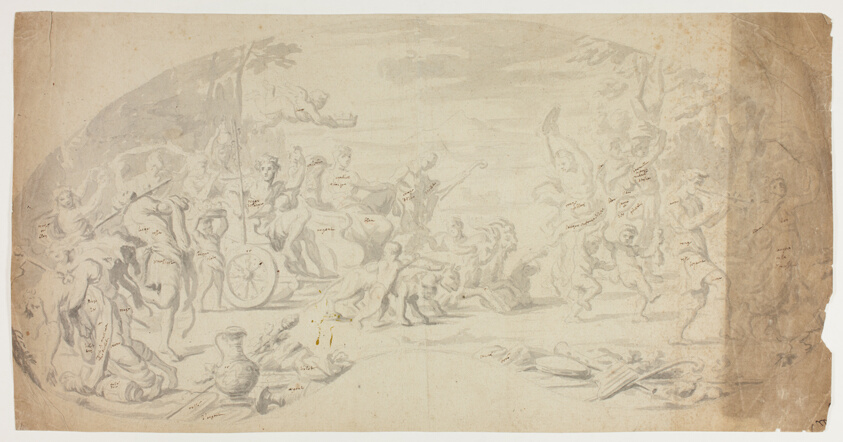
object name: Drawing and Watercolor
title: Triumph of Bacchus and Ariadne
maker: Annibale Carracci, after; Italian, 1560-1609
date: after 1600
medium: Brush and gray wash, with graphite, on ivory laid paper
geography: Italy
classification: ink or chalk wash; drawings (visual works); prints and drawing